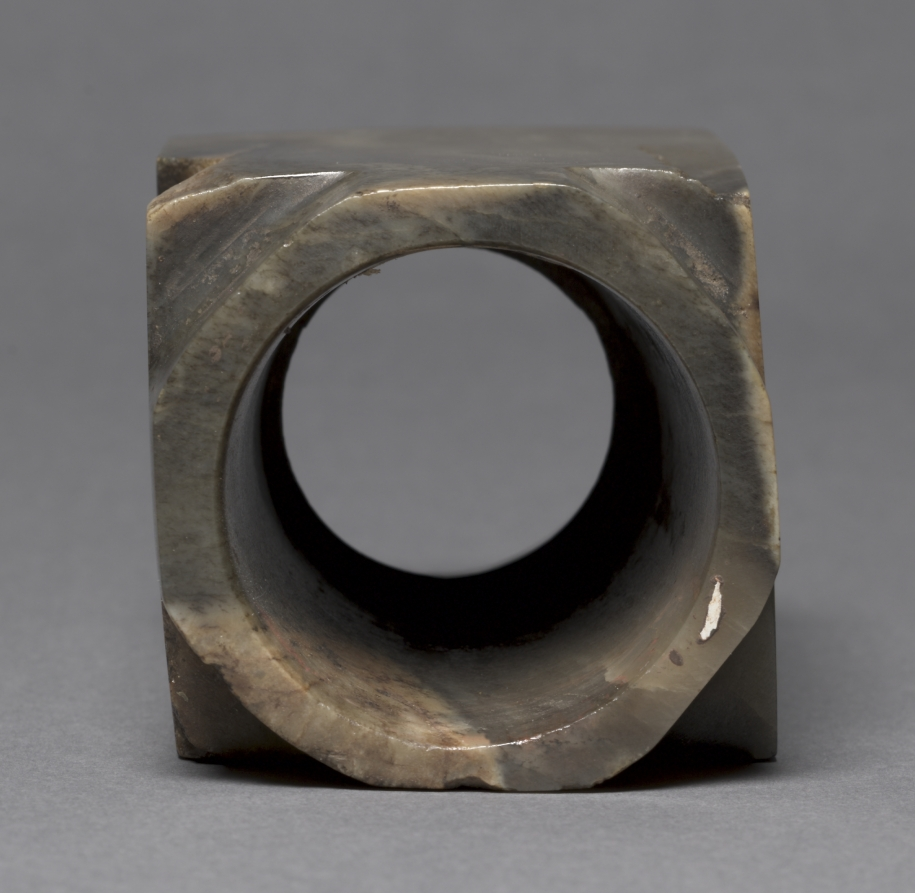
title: Ceremonial Tube (Cong)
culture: China, Shang dynasty (c. 1600–c. 1046 BCE)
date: c. 1600–1056 BCE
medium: jade (nephrite)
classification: Jade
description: The cong, a cylindrical tube with a square outer section, was one of the most impressive jade implements used in ancient rites. The ritual text Rites of Zhou mentions the use of the cong for the worship of the earth. However, its function and meaning in the earlier Neolithic societies are not completely understood.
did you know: The Interior cavity of this piece of jade was bored from both ends, making an irregular ridge near the center.